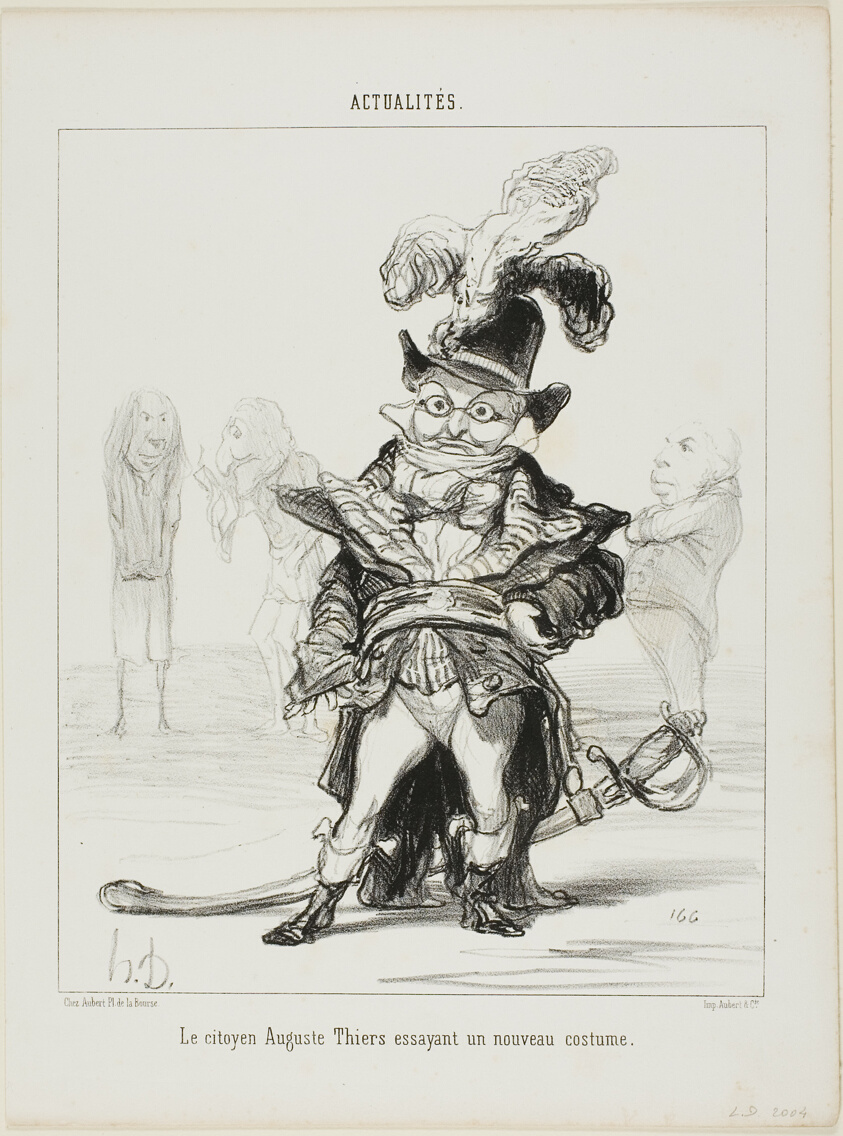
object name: Print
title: Citizen Thiers trying on a new costume, plate 114 from Actualités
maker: Honoré Victorin Daumier; French, 1808-1879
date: 1850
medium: Lithograph in black on white wove paper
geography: France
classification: lithograph; print; prints and drawing